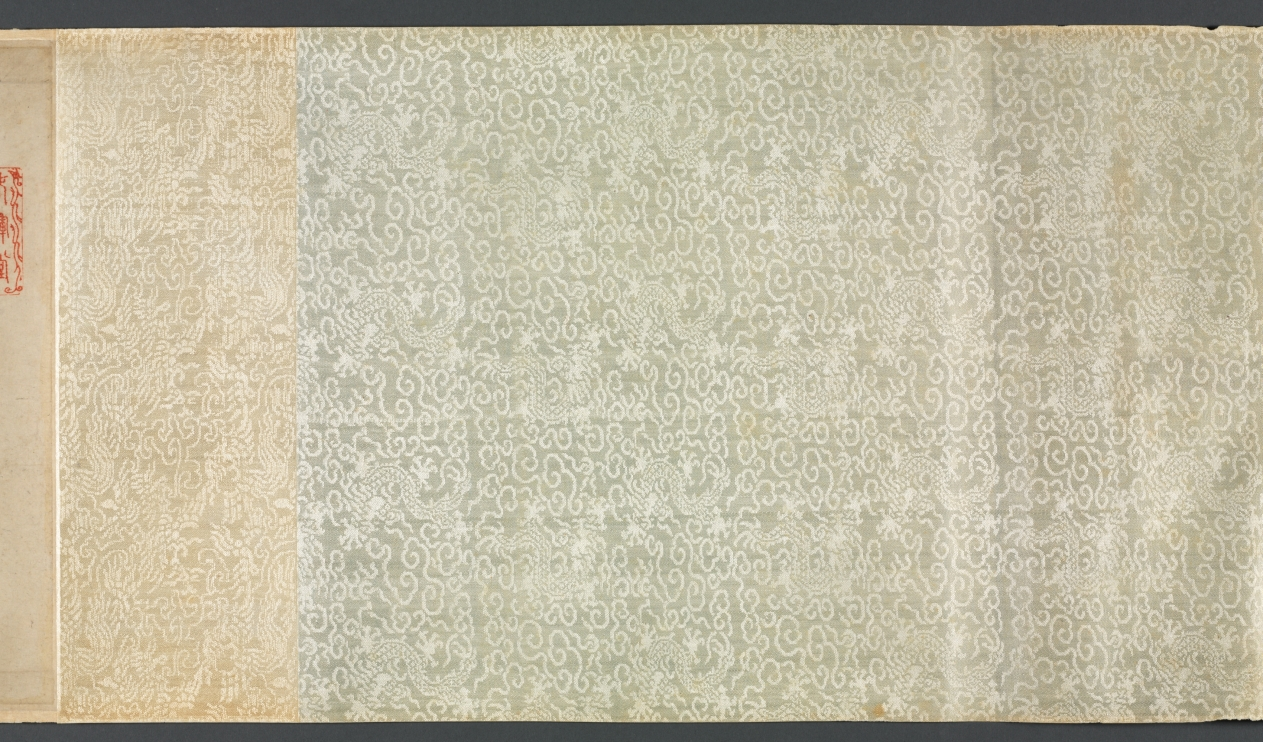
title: The Ninth Day Literary Gathering at Xing’an [Temporary Retreat]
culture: China, Qing dynasty (1644-1911)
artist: Fang Shishu (Chinese, 1693–1751)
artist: and Ye Fanglin (Chinese, active late 1600s–mid-1700s)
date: 1743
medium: Handscroll; ink and color on silk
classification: Painting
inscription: Fang Shishu's seal at beginning of painting: Ou ran shi de 偶然拾得. Ye Fanglin's seal at end of painting: Fanglin 芳林. Frontispiece title dated 1743 and 3 seals of Chen Bangyan 陳邦彦 (1678-1752).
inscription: 行庵在揚州北郭天寧寺西隅，馬君嶰谷半槎兄弟購僧房隙地所築，以為游息之處也。寺為晉謝太傅別墅。西隅饒古木，䨴鬱陰森，入林最僻，不知其近郛郭。庵居其中，無斲礱髤采之飾，惟軒庭多得清蔭，來憩者每流連而不能去。乾隆癸亥九日，積雨既收，風日清美，遂約同人，咸集於斯，中縣［懸］仇英白描陶靖節像，采黃花，酌白醪為供，乃以人世難逢開口笑，菊花雖插滿頭歸分韻賦詩。陶陶衎衎，觴詠竟日。既逾月，吳中寫真葉君敬［震］初適來，群貌小像，合為一卷，方君環山補景，命曰九日行庵文讌圖。裝池成，將各書所作於後，而囑鶚為之記。記按圖中共坐短榻者二人：右箕踞者，為武陵胡復齋先生期恆；左抱膝者，為天門唐南軒先生建中也。坐繩床者二人：中手牋者，歙方環山士庶；左仰首如欲語者，江都閔玉井華也。一人坐藤塾捻髭者，鄞全謝山祖望也。一人倚石坐若凝思者，臨潼張漁川四科也。樹下二人：離立把菊者，錢唐厲樊榭鶚；袖手者，錢唐陳竹町章也。一人憑石床坐撫琴者，江都程香溪先生夢星也。聽者三人：一人垂袖立者，祁門馬半查曰璐；二人坐瓷塾，左倚樹、右跂腳者，歙方西疇士疌 、汪恬齋玉樞也。二人對坐展卷者，左祁門馬嶰谷曰琯，右吳江王梅沂藻也。一人觀者，負手立於右，江都陸南圻鐘輝也。從後相倚觀者一人，歙洪曲溪振珂也。童子種菊者三人：樹間侍立者一人，撰杖、執卷者各一人。其植有蕉、有竹，又有雜樹，作丹黃青碧之色，紀時也。夫重九佳名，舉俗所重，而高常侍歎獨坐而搔首，陸天隨感登高以剫門，無其時地與人耳。今吾儕幸生太平，遇勝地，又皆素心有文之侶，固人世不可多得之會；而此十六人者，或土斷，或客游，聚散不常。異日者，歲月遷流，撫節物以有懷，一披此圖，悅如晤對。將來覽者，或亦不異此意乎。甲子夏五十有四日厲鴞記並書。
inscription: 揚州為江北大都會，居民連甍接楹，笙歌輿從，竟日喧聚，其於淸歌雅集，葢罕矣。城北天寧寺，為晉謝公駐節時所游息，其中有行庵，吾友馬君嶰谷、半查兄弟之小築也。地不踰五畝，而老樹古藤，森蔚相望，皆千百年物，間以修竹，春鳥秋蟲，更唱迭和，其間曲廊高榭，位置閑適。出門未數百步，即黃塵濁流極目，令人作惡。而此中獨蕭然有人外之思。乾隆八年九日，嶰谷兄弟招集同社一十四人祀陶公，出所藏仇實父白描像懸於閣上，各賦一詩。予方留滯西泠，未得預也。又踰旬而予至，諸君方擬繪圖記事，嶰谷曰：是不可無君。乃以展日更舉，令予得陪卷軸之末；而洪君曲溪，兩度皆以病失約，然故吟社中人也，亦補入焉。予太息謂諸君曰：謝公之風流，千古如在；然其游息於斯也，則與東山賓從之樂稍不同矣。公之為是行也，蓋以符氏之亂，思北定中原也。而其時公巳困於讒口，不自安於朝；雖在河朔極有可乘之會，而神明內索，徘徊不克自前。老師左次，竟無尺寸之功，坐失事幾。吾常過邵伯之埭，吊法雲之荒祠，未嘗不喟然累啼，以為明德之衰也。至若九日嘉名，陶公高格，固在羲皇懷葛之間；然而讀其 止酒之詩，蒼梧漢水之感，以瘦詞寄其孤憤則夫黃花白酒，蓋亦不得巳而漫與焉者。今吾輩生逢太平之日，書淫墨癖，是處留連，胸次中了無一事，為江湖之幸民，論人雖甚媿，論其時與地，則不可不私相慶也。諸君曰：善。圖之詳巳見於厲君樊榭記中。予之許為嶰谷兄弟序斯圖也，三年於茲；今夏重披圖捉筆，而唐丈南軒，巳化為異物矣。對酒當歌，人生幾何，願與諸君並日相遇從焉。丙寅夏杪孤山社小泉翁全祖望序。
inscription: 6 additional colophons and 15 additional seals: 1 colophon, dated 1746, and 1 seal of Huang Zhijun 黃之雋 (1668-after 1746); 1 colophon and 2 seals of Zha Xiang 查祥 (1718 jinshi); 1 colophon, dated 1746, and 3 seals of Zhang Siwen 張思問; 1 colophon, dated 1748, and 4 seals of Shao Dong 卲東 (1721 jinshi); 1 colophon, dated 1753, and 2 seals of Fang Shiju 方世舉 (signing as Fang Funan 方扶南); 1 colophon, dated 1808, of Ruan Yuan 阮元 (1764–1849); 3 seals unidentified.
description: By the 1700s, Yangzhou was flourishing both economically and culturally as the most prosperous city in China, having surpassed all other Jiangnan cities in their creation of gardens. This group portrait commemorates a literary gathering in the private garden of the salt merchants and art patrons Ma Yueguan (1688–1755) and his brother Ma Yuelu (1697–after 1766) in Yangzhou. Ma Yueguan received imperial recognition for providing financial aid and food relief for those affected by flood and drought. Ma Yueguan is seen seated at the end of the painting holding an open scroll while Ma Yuelu stands behind the qin instrument player. Among the guests were officials, scholars, poets, painters, and merchants, a mix of local members of a poetry club reflecting increasing social diversity.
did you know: The two hosts and their fourteen guests were all officials, scholars, poets, painters, and salt merchants.